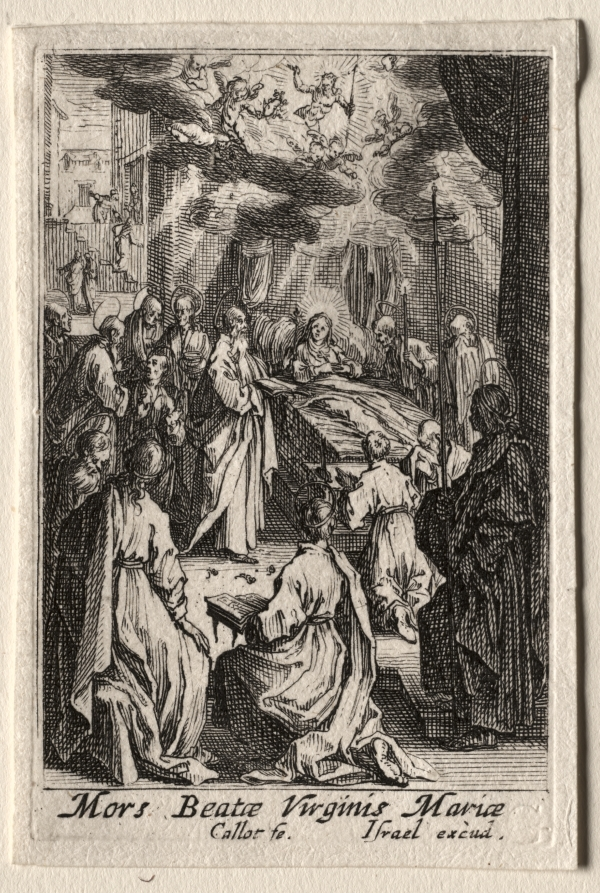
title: The Life of the Virgin: The Death of the Virgin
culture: France, 17th century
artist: Jacques Callot (French, 1592–1635)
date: ca. 1633–34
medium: etching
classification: Print